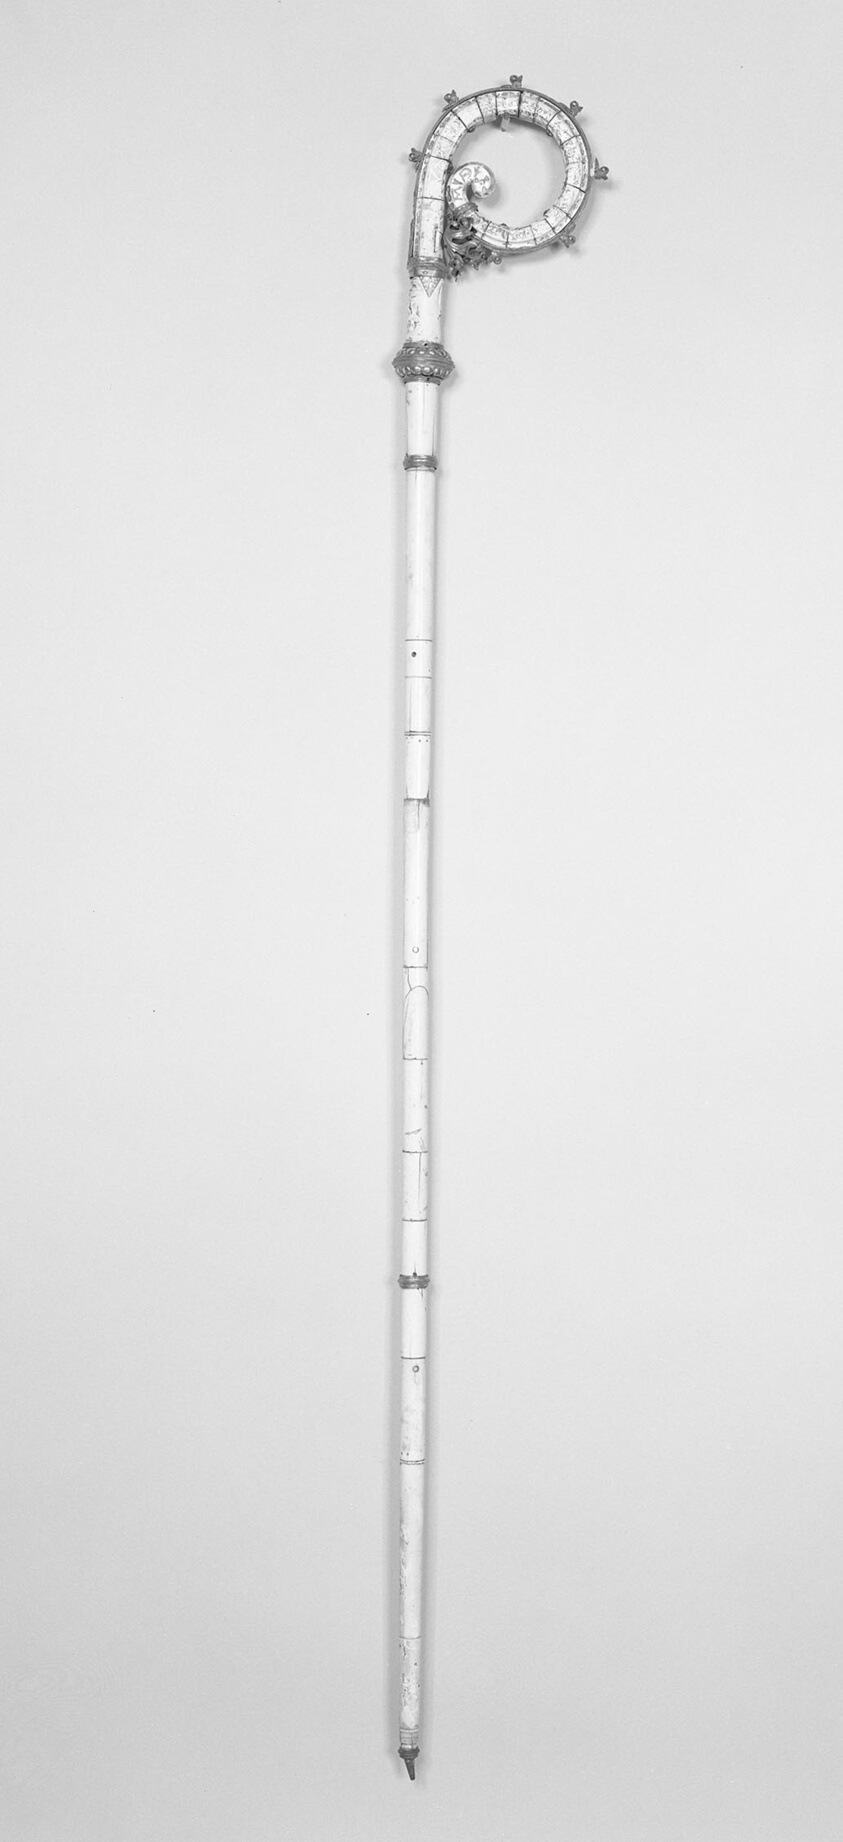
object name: Decorative Arts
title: Crozier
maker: Italian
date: 14th century, with 15th century German and other later metal fittings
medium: Ivory with traces of gilding and polychromy; gilt bronze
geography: Italy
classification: functional object; sculpture; decorative arts